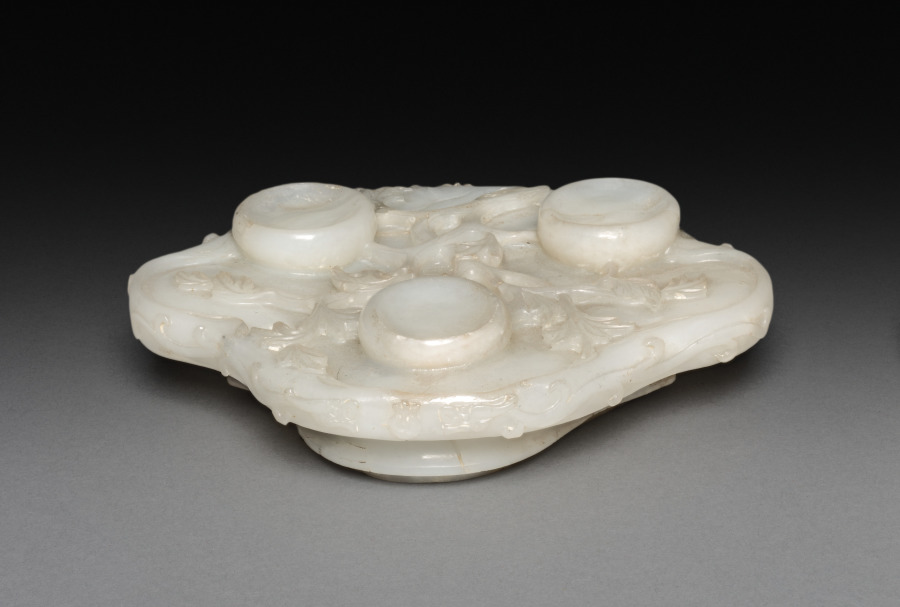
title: Three-Sectional Altar Group: Koro (bottom section of base)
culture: China, Qing dynasty (1644-1911)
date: 1644–1911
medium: jade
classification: Jade